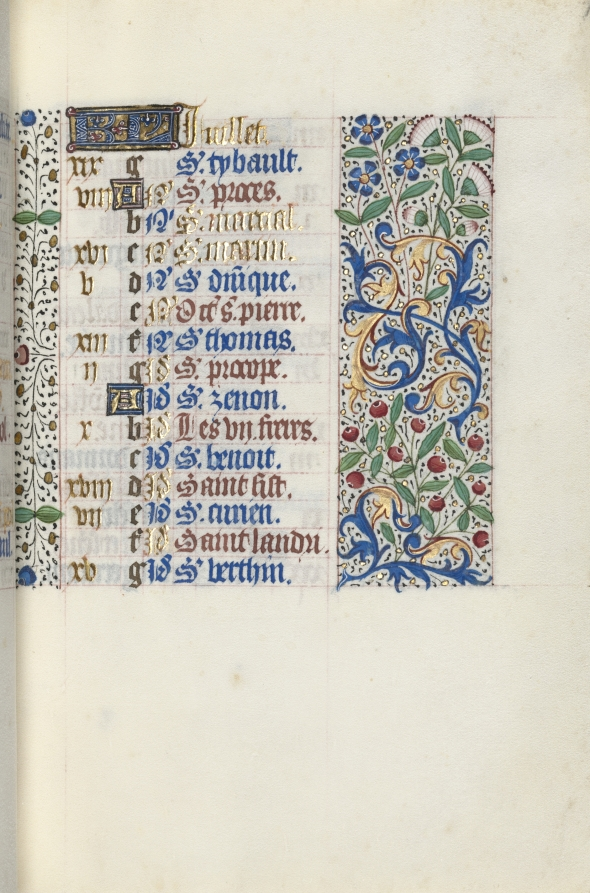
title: Book of Hours (Use of Rouen): fol. 7r, Calendar Page for July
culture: France, Rouen, 15th century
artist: Master of the Geneva Latini (French, active Rouen, 1460–80)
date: c. 1470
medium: ink, tempera, and gold on vellum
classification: Bound Volume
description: In the late 1400s and early 1500s Rouen was an established and important center of book production. The city’s cathedral had a wealthy chapter that spent large sums of money to commission books and to maintain its extensive library. The stationers and booksellers would have likely been concentrated in or near the cathedral precinct. This artist, named after a manuscript now in Geneva, was Rouen’s principal illuminator during the second half of the 1400s.